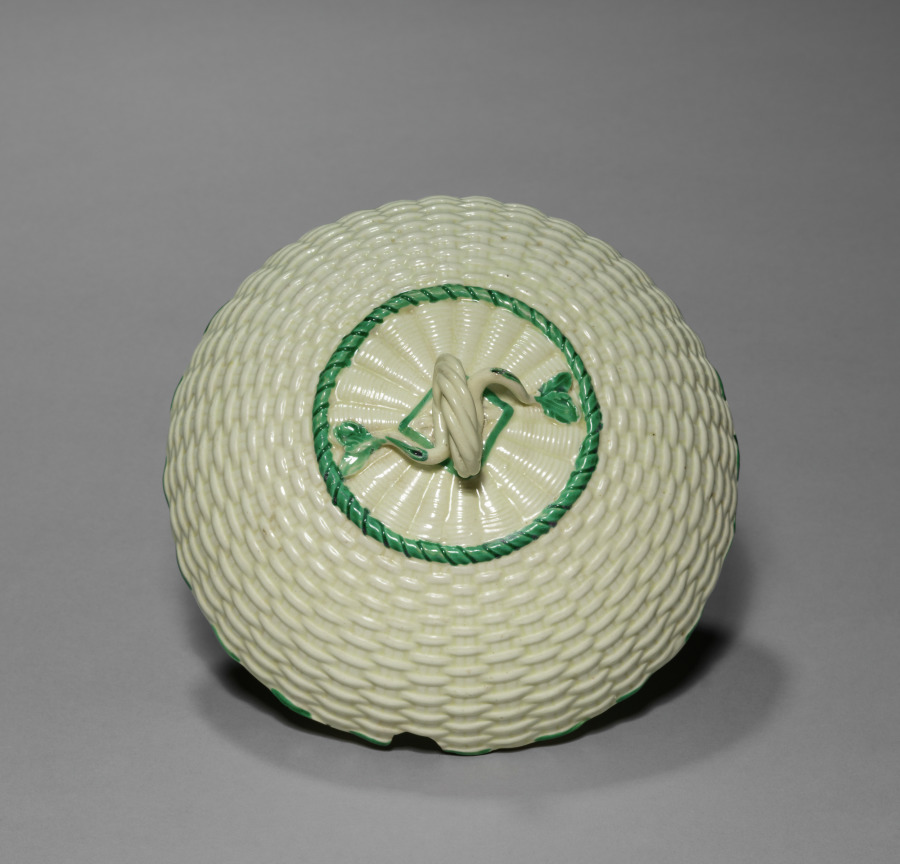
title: Cover for a Wicker-Work Sauce Tureen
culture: England, 18th-19th century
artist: Wedgwood Factory (British)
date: c. 1780–1840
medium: earthenware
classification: Ceramic